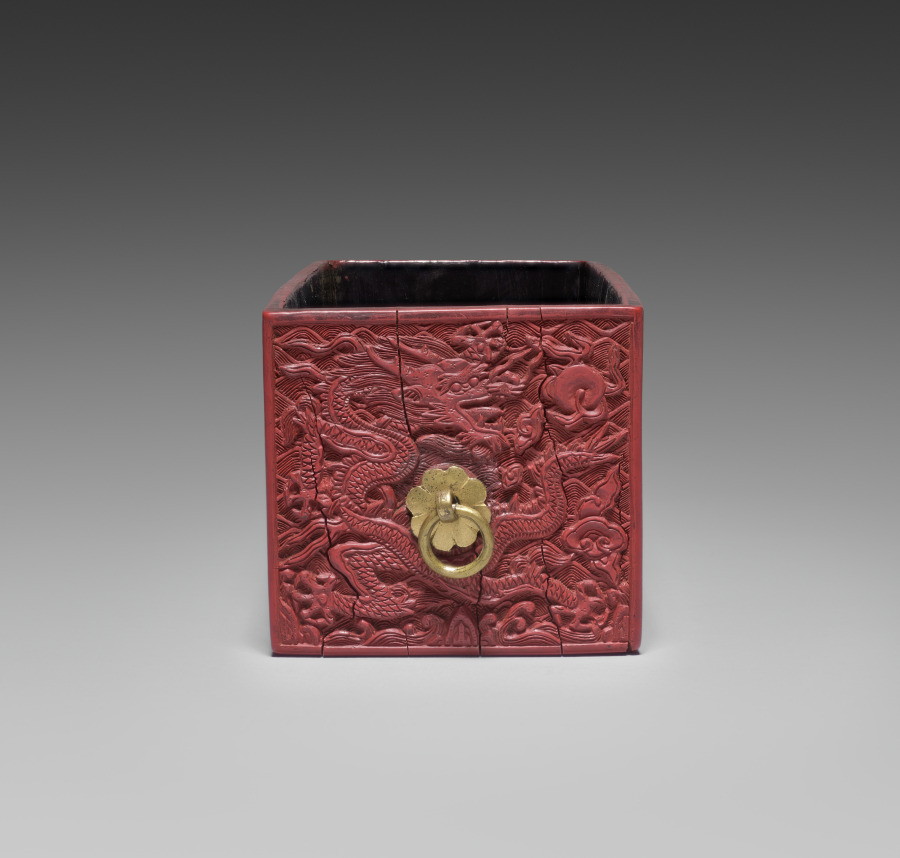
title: Drawer for a Tihong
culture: China, Ming dynasty (1368-1644), Wanli reign (1572-1620)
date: 1585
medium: carved cinnabar lacquer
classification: Lacquer